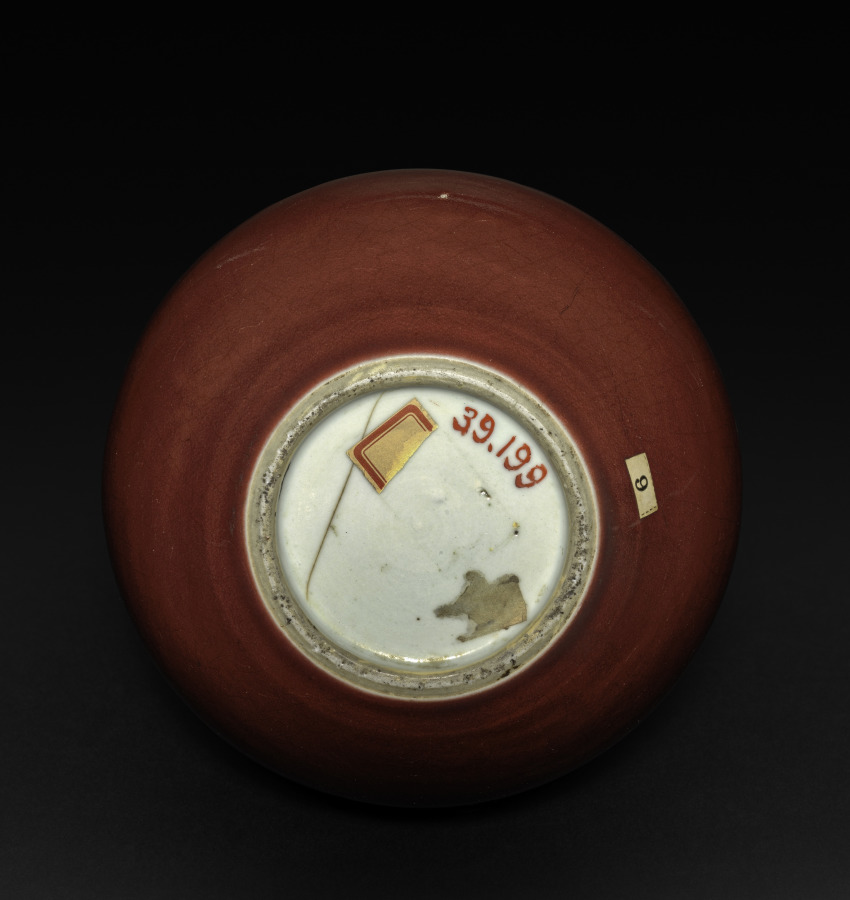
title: Bottle-shaped Vase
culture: China, Qing dynasty (1644–1911), Qianlong reign (1736–95)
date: 1736–95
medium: porcelain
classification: Ceramic